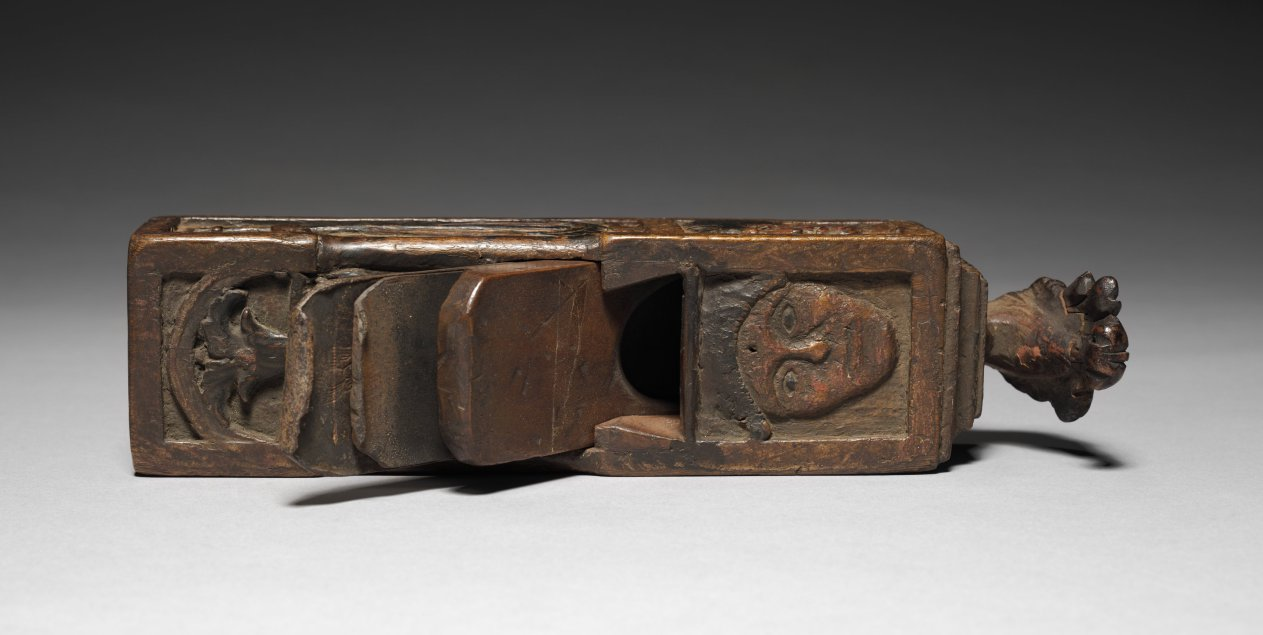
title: Carpenter's Plane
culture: Italy, late 16th century ?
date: late 1500s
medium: wood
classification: Tool